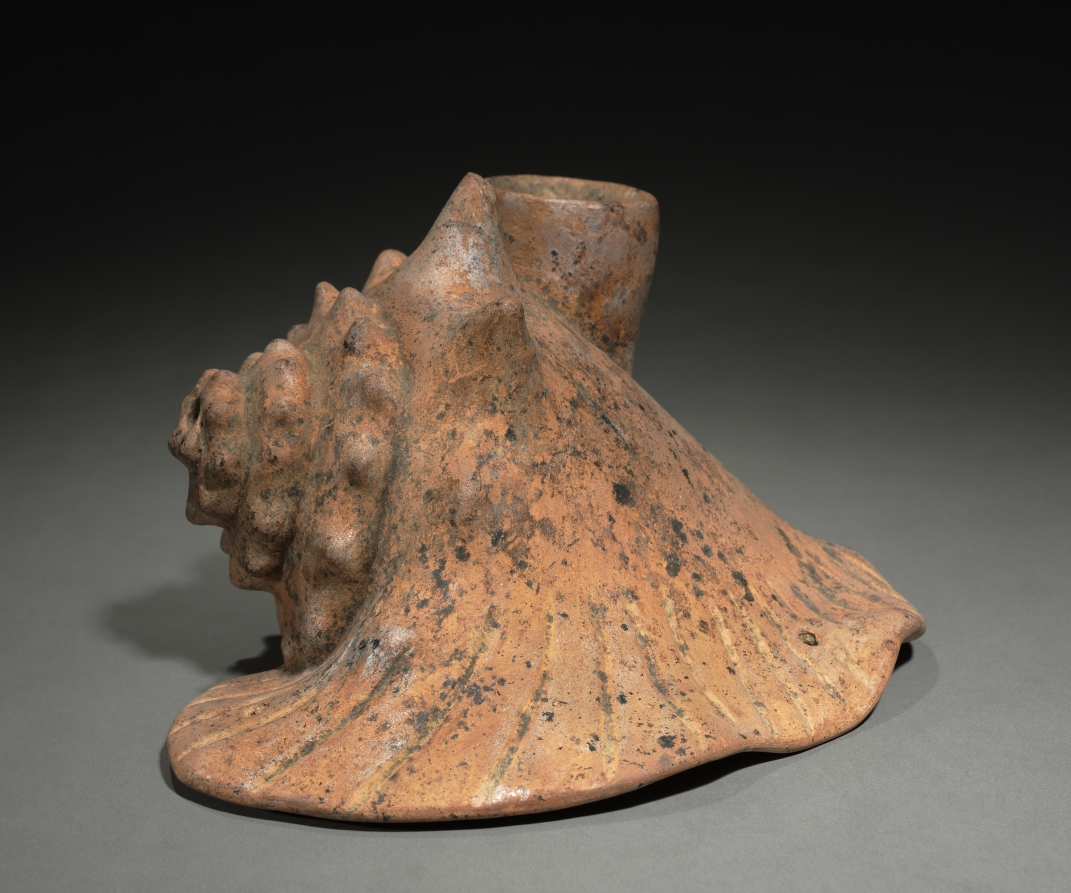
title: Conch Shell Trumpet Vessel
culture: West Mexico, Colima, Comala style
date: 200 BCE–300 CE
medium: earthenware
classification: Ceramic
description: Conch shell trumpets were used during many kinds of important events throughout the ancient Americas. The shells were converted to trumpets by removing the tip to form a mouthpiece, as this ancient ceramic replica of a trumpet shows. Holes were often drilled in the shell for a carrying cord.